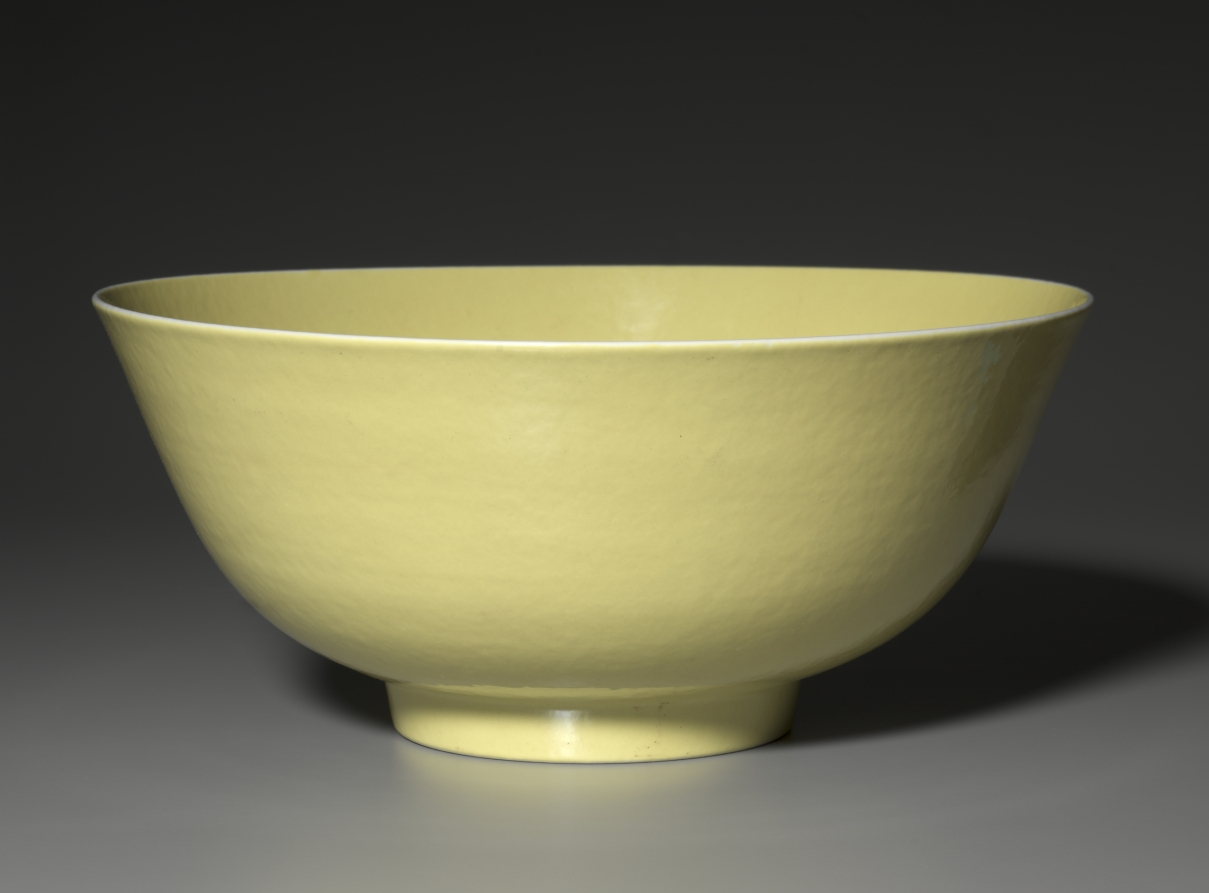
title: Large Bowl with Yellow Enamel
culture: China, Qing dynasty (1644-1911), Daoguang mark and reign (1821-50)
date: 1821–50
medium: enameled porcelain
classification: Ceramic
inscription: 大清道光年制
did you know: This monochromatic yellow dish was made for the imperial household.